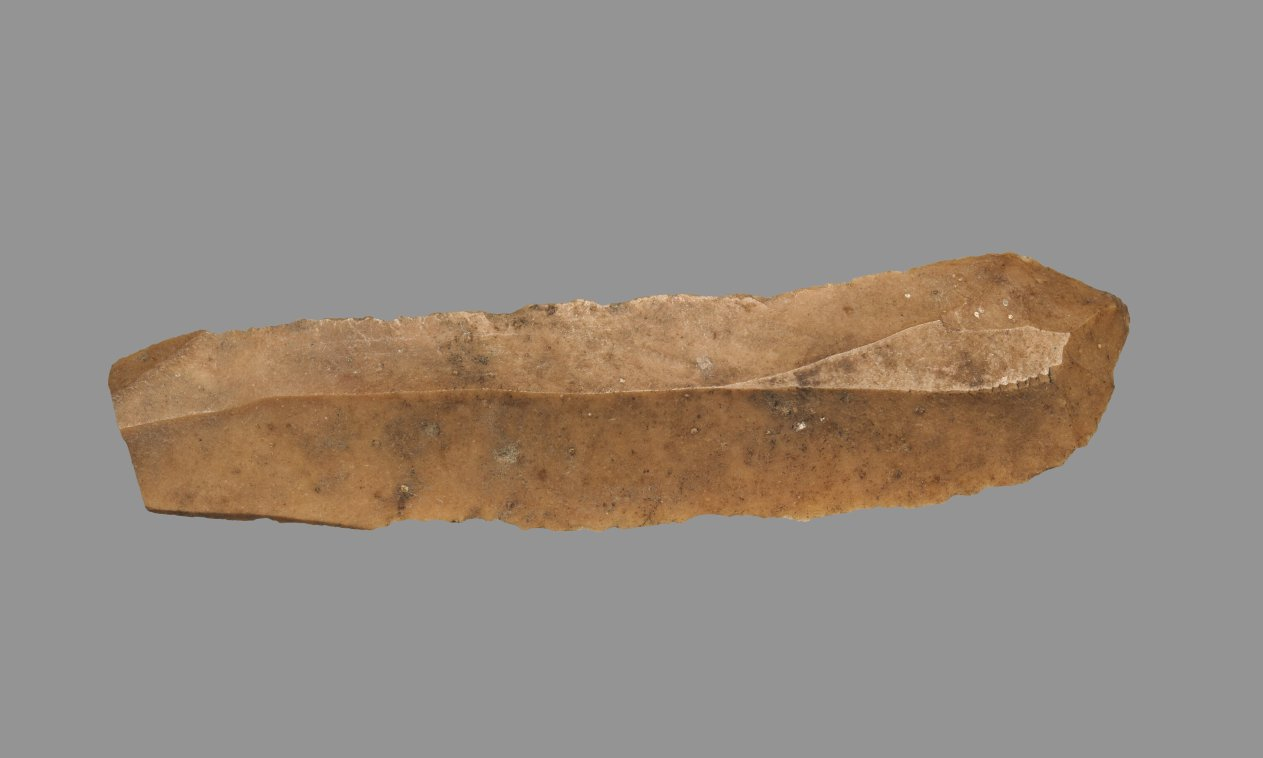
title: Sickle Blade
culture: Egypt, Middle Kingdom (2040–1648 BCE), Dynasty 12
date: 1980–1801 BCE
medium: flint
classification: Implements